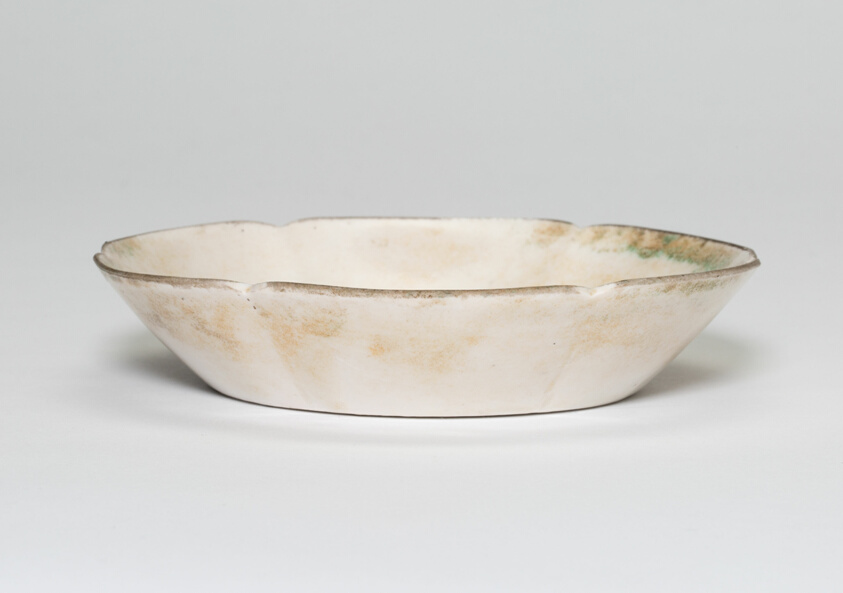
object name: Vessel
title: Lobed Dish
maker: China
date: Song dynasty (960–1279)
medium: Ding ware; stoneware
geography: China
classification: ceramics; asian art